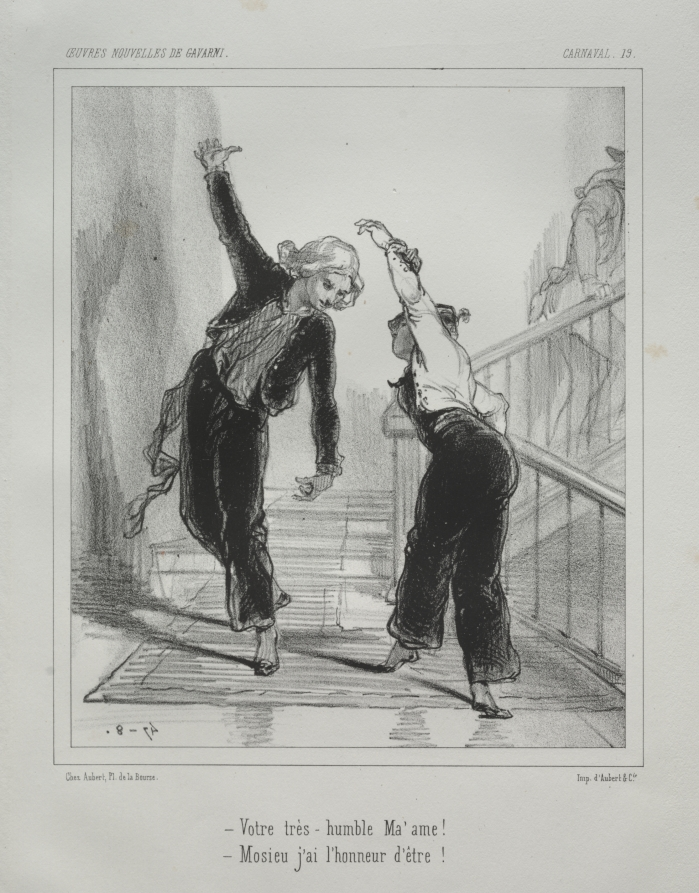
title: Carnaval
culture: France, 19th century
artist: Paul Gavarni (French, 1804–1866)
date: c. 1841–47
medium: lithograph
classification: Print